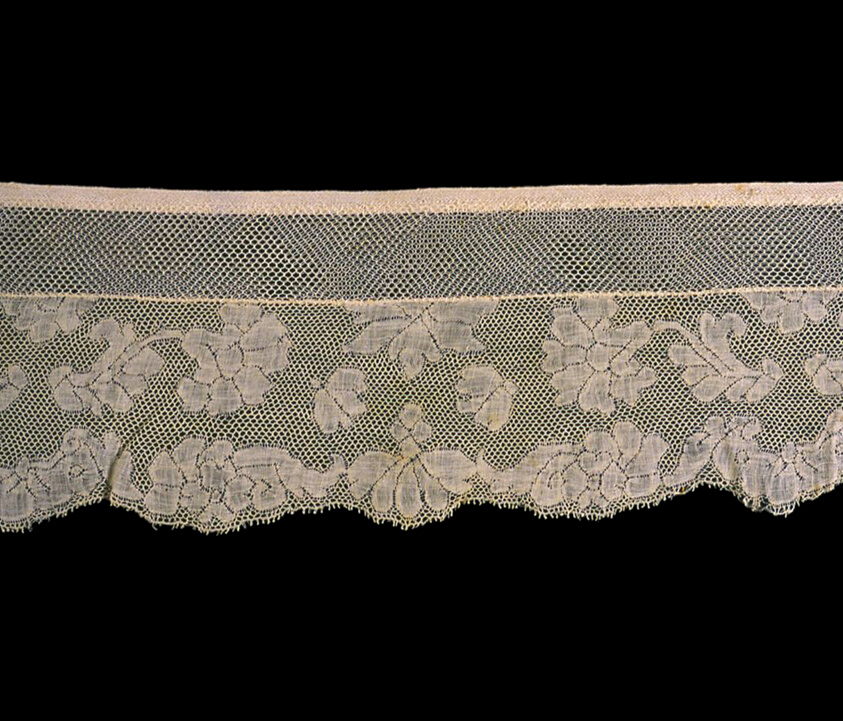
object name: Textile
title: Border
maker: France, Valenciennes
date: 1765/75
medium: Linen, bobbin straight lace of a type known as "Valenciennes" with a round Valenciennes mesh ground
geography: Valenciennes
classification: textile; lace - bobbin